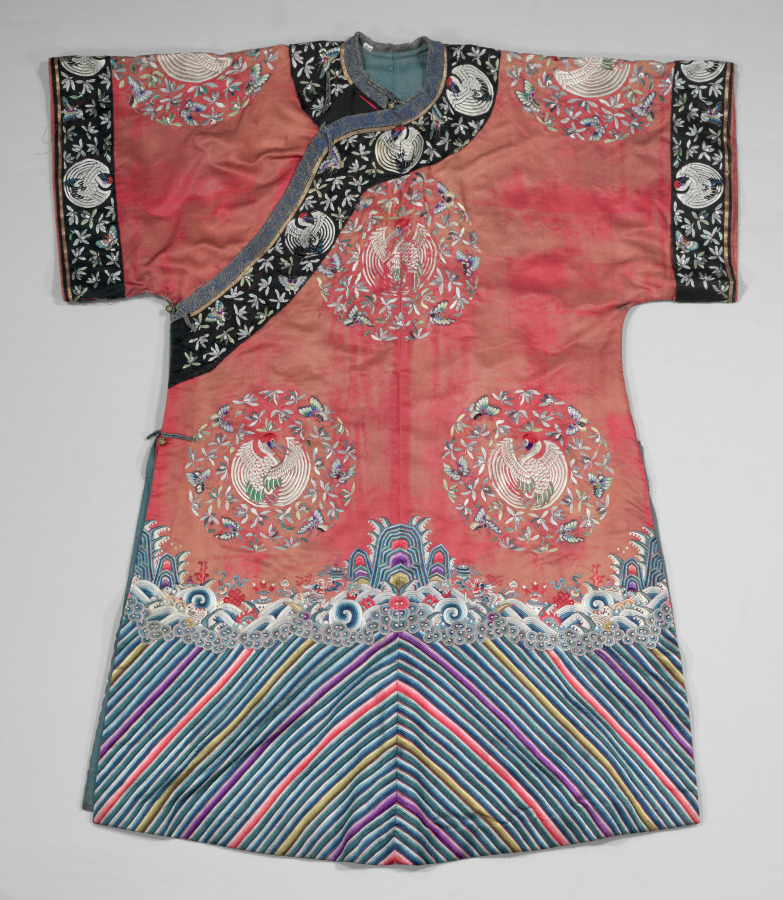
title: Title Robe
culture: China, late 19th century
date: c. 1890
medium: embroidery, silk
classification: Garment